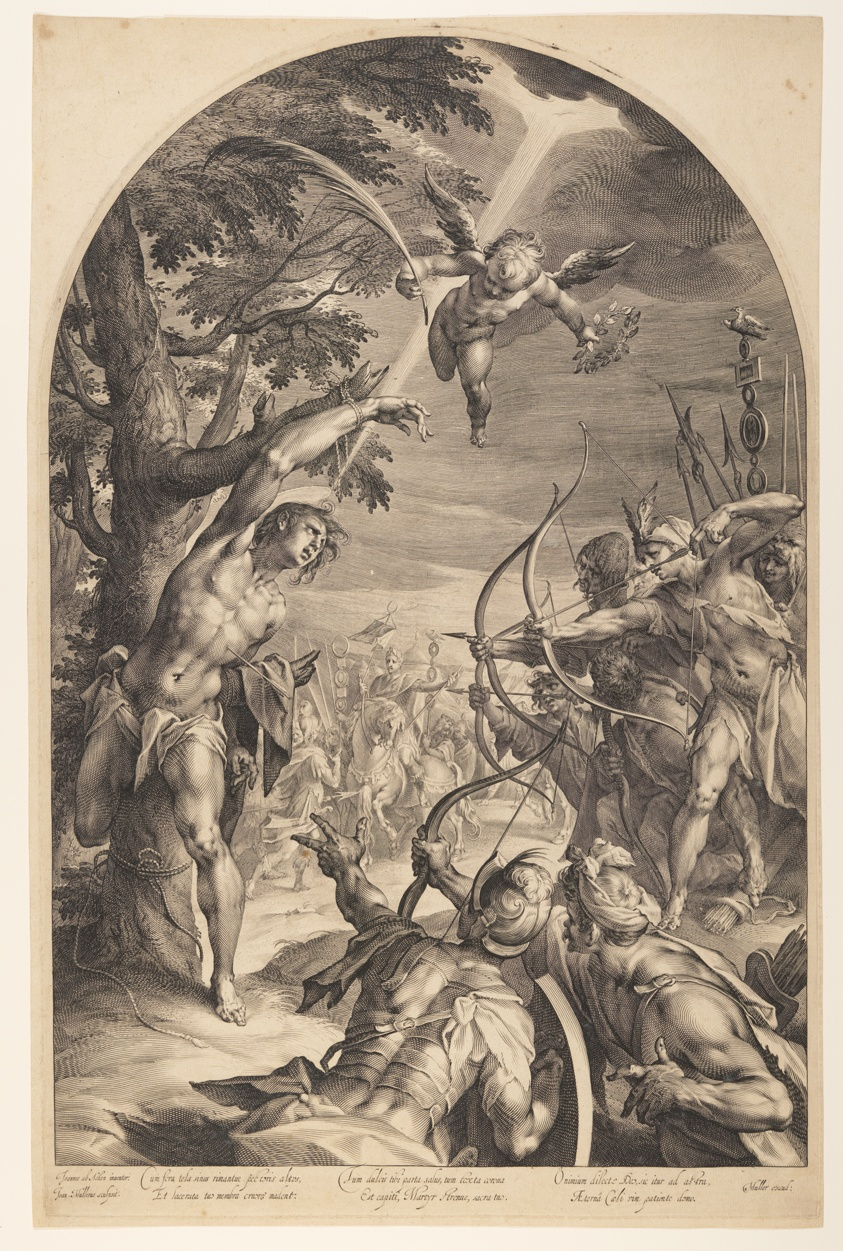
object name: Print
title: Martyrdom of Saint Sebastian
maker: Jan Harmensz Muller (Dutch, 1571–1628); after Hans von Aachen (German, 1552–1615)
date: c. 1600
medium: Engraving on ivory laid paper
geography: Netherlands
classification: engraving; paper; print; prints and drawing